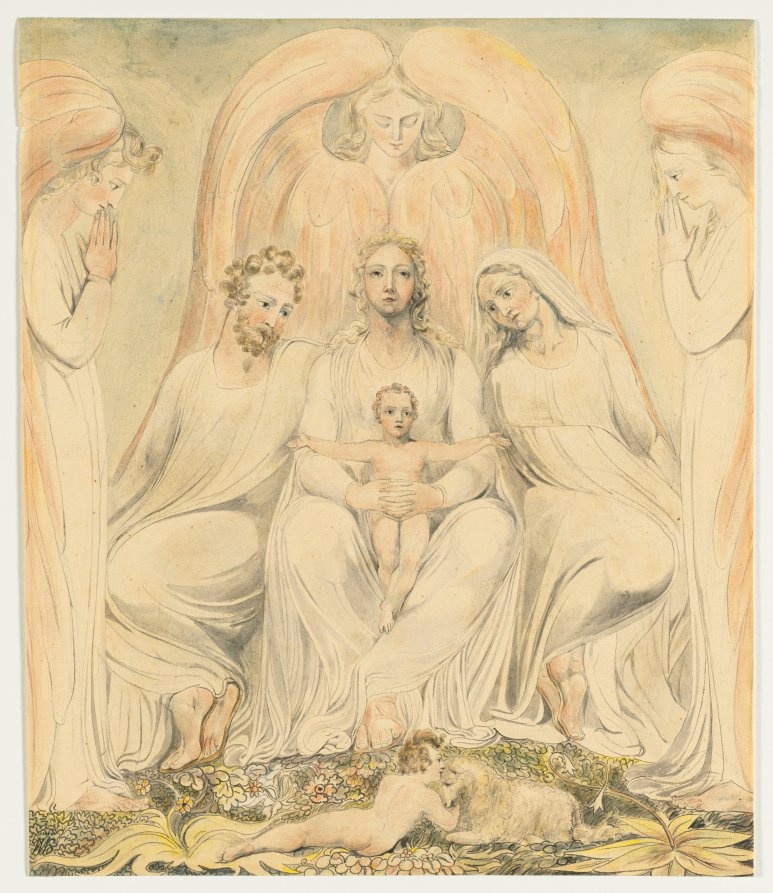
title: The Holy Family (Christ in the Lap of Truth)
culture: England, London, 18th century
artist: William Blake (British, 1757–1827)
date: c. 1805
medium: black, gray, and brown ink applied with pen and point of brush; gray, pink, yellow, and green wash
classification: Drawing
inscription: signed, lower right, in black ink: [artist's monogram:8 inv / wb]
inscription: verso, upper center, in graphite: G [collector's mark? (not in Lugt)]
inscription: across bottom, in graphite: no. 9 [S?]ingle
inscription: across bottom, in graphite: The Holy Family / Jesus-Mary-Joseph-Elizabeth + St. John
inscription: lower center, in graphite: 50/ [7?]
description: Although he rejected institutionalized religion, Blake was intensely spiritual, and much of his art was inspired by a highly personal reading of the Bible or by literature based upon it, such as John Milton’s Paradise Lost (1667). The Virgin Mary is centered in this highly stylized composition. Upon her lap she clasps the infant Christ whose outstretched arms foreshadow the Crucifixion. The Mother and Child are flanked by Saint Joseph on the left, and Saint Anne (the Virgin’s mother), on the right. Below, Saint John the Baptist, who foretold Christ’s death and resurrection, plays with a lamb.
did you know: This drawing was first owned by Thomas Butts, an English civil servant who became William Blake's most important patron and supporter for about two decades.